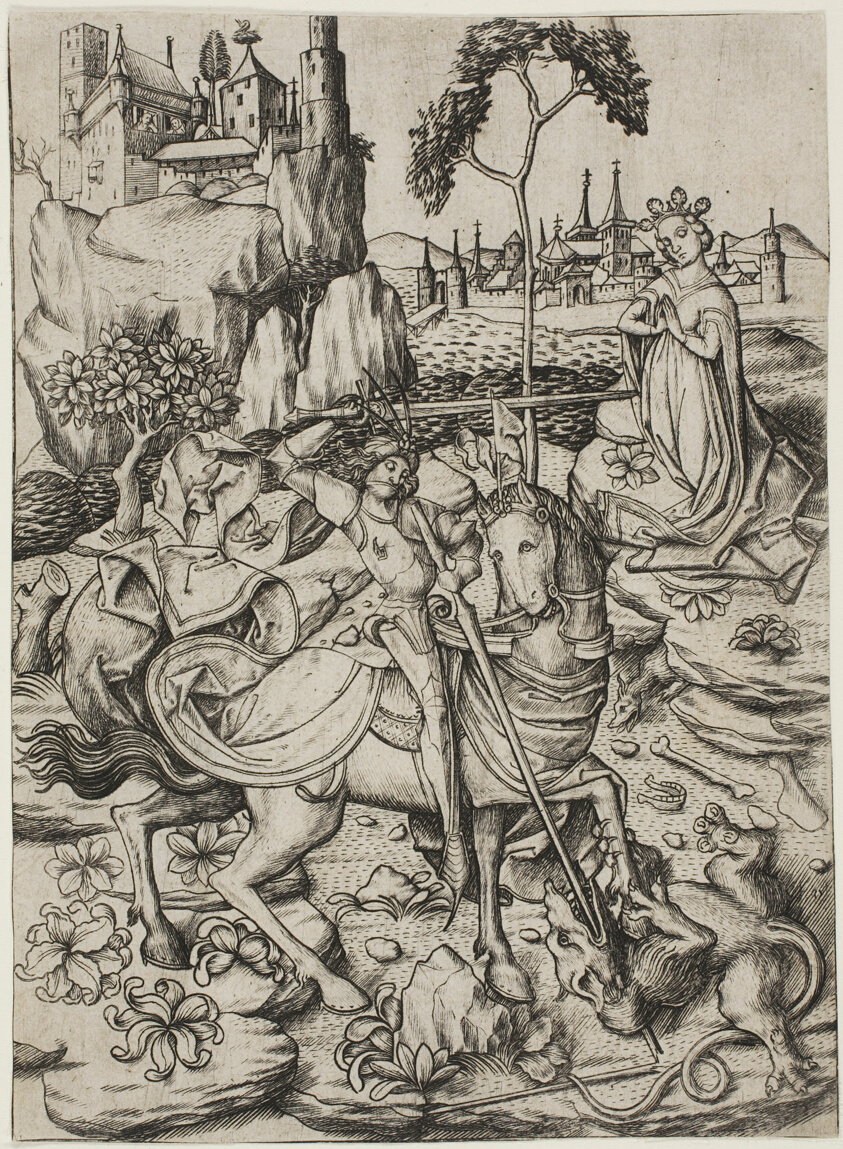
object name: Print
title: Saint George with the Stork's Nest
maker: Master E. S.; German, active c. 1450-1467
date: c. 1450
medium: Engraving, printed in black, on paper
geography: Germany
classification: engraving; print; prints and drawing